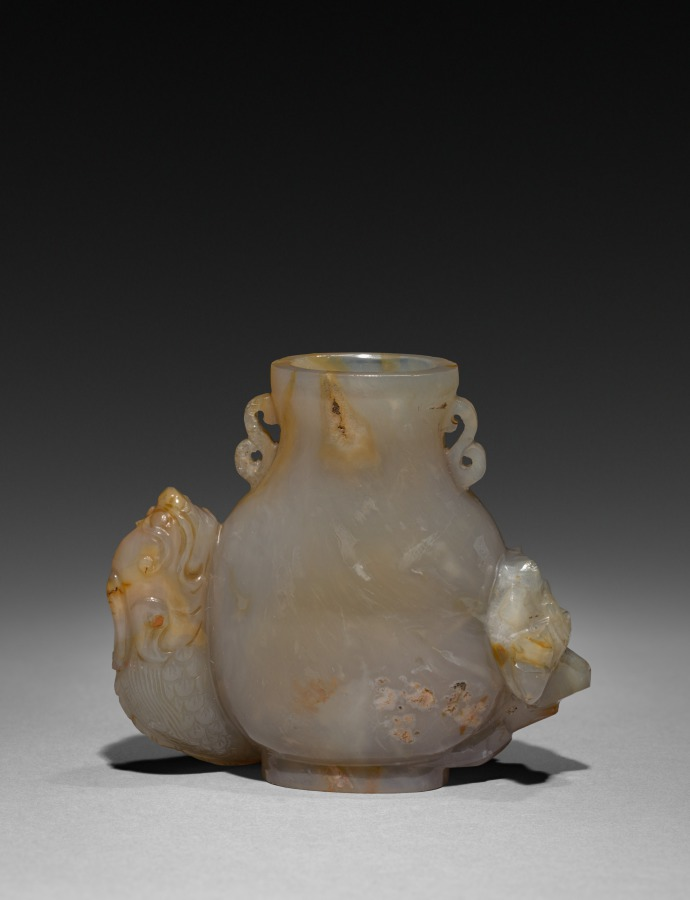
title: Vase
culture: China, Qing dynasty (1644-1911)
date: 1644–1911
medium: glass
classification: Glass